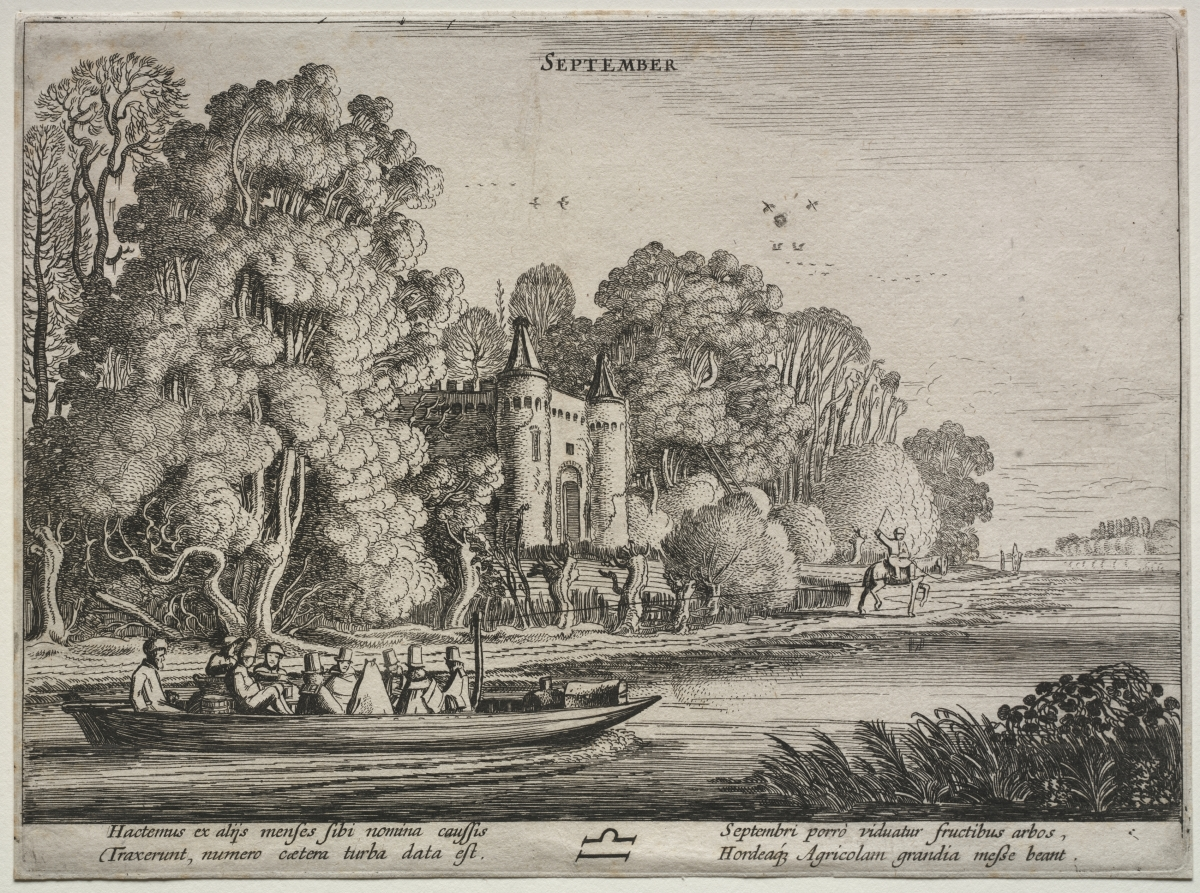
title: The Twelve Months: September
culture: Netherlands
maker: Jan van de Velde II (Dutch, 1593–1641)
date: 1608–18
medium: etching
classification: Print